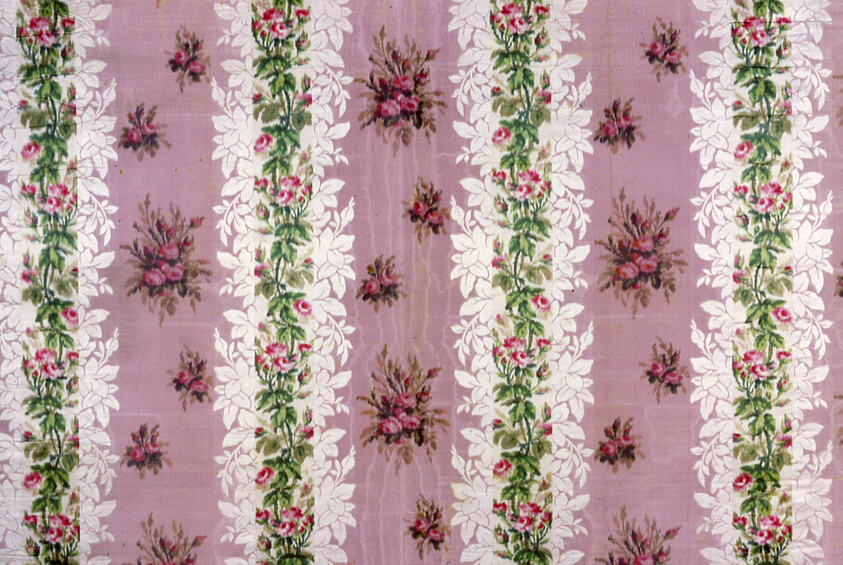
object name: Textile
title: Panel (Dress Fabric)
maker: France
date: 1860s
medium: Silk, bands of warp-faced weft ribbed plain weave; warp painted appearance (chiné); watered (moiré); warp-float faced satin weave; warp painted appearance (chiné) and warp-float faced satin weave self-patterned by areas of plain interlacing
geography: France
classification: textile; weaving - printed; costume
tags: flowers, foliage